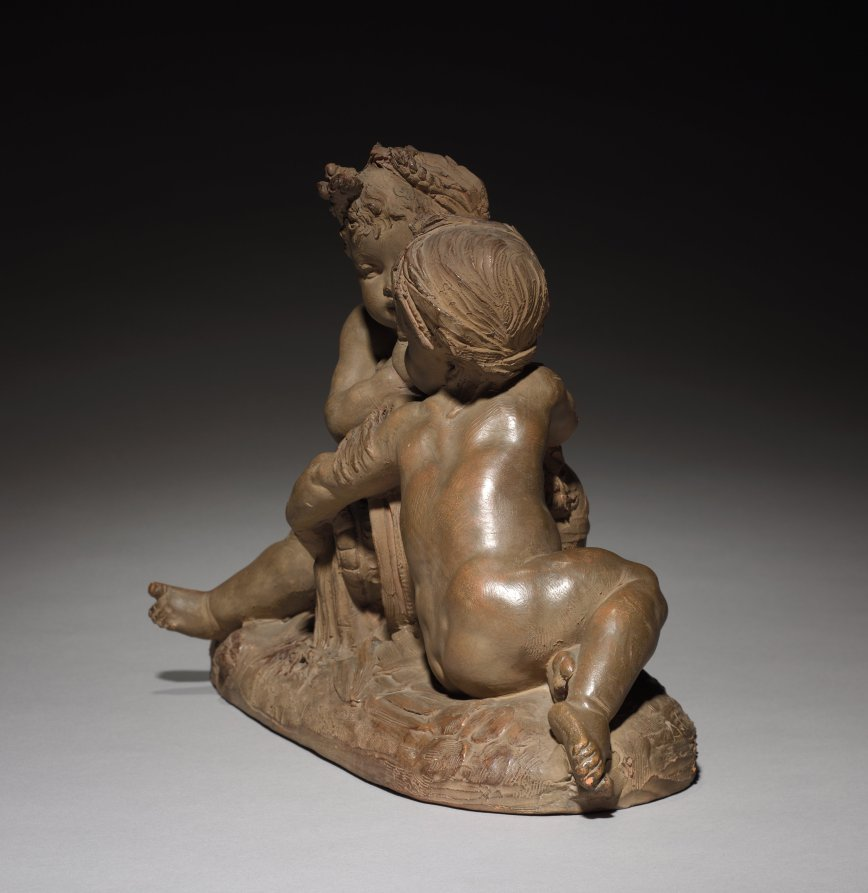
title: Putti Representing Earth and Water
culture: France, 19th century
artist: Albert-Ernest Carrier-Belleuse (French, 1824–1887)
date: 1865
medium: terracotta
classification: Sculpture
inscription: Signed near right corner: "A. Carrier (letter 'E' smeared)"; inscribed in pencil on upper surface of wooden base: "#2268" and "Henschel"; inscribed in pencil on bottom of wood base: "2268" and "Made-in-France"